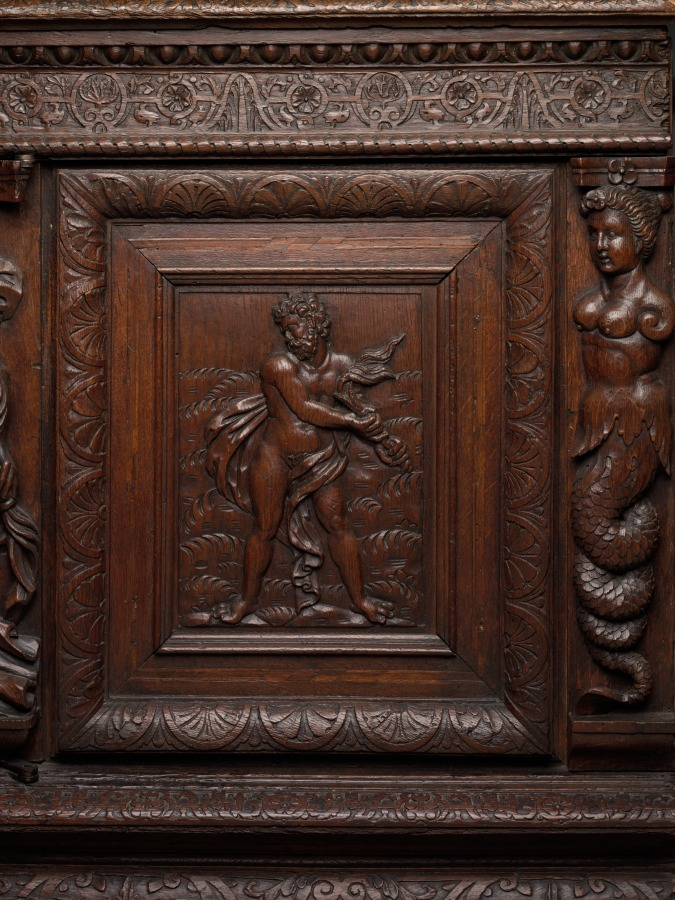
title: Chest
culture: France, Normandy, 16th century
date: 1550–1599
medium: oak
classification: Furniture and woodwork